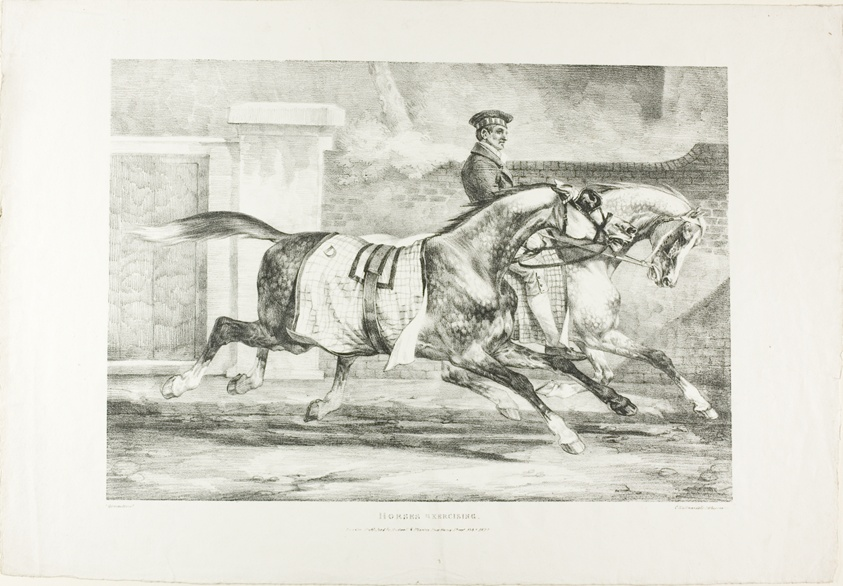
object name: Print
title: Horses Exercising, plate 6 from Various Subjects Drawn from Life on Stone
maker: Jean Louis André Théodore Géricault (French, 1791-1824); printed by Charles Joseph Hullmandel (German and English, 1789-1850); published by Rodwell and Martin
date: 1821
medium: Lithograph in black on ivory wove paper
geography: France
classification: lithograph; print; prints and drawing